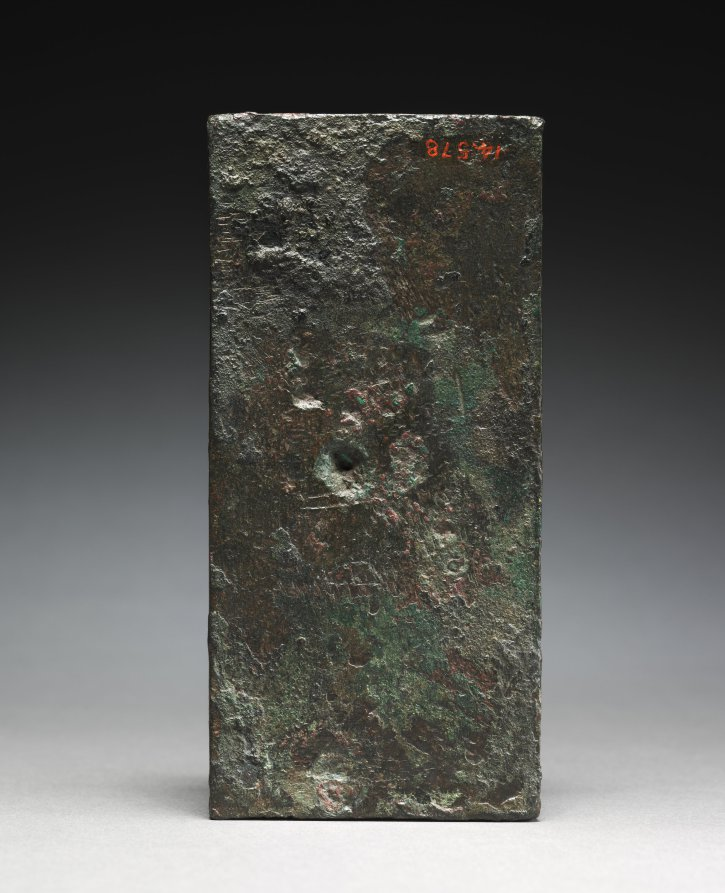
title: Statue Base Dedicated to Amen-Ra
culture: Egypt, Late period (715–332 BCE), Dynasty 26 or later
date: 664–525 BCE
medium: bronze, hollow cast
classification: Sculpture